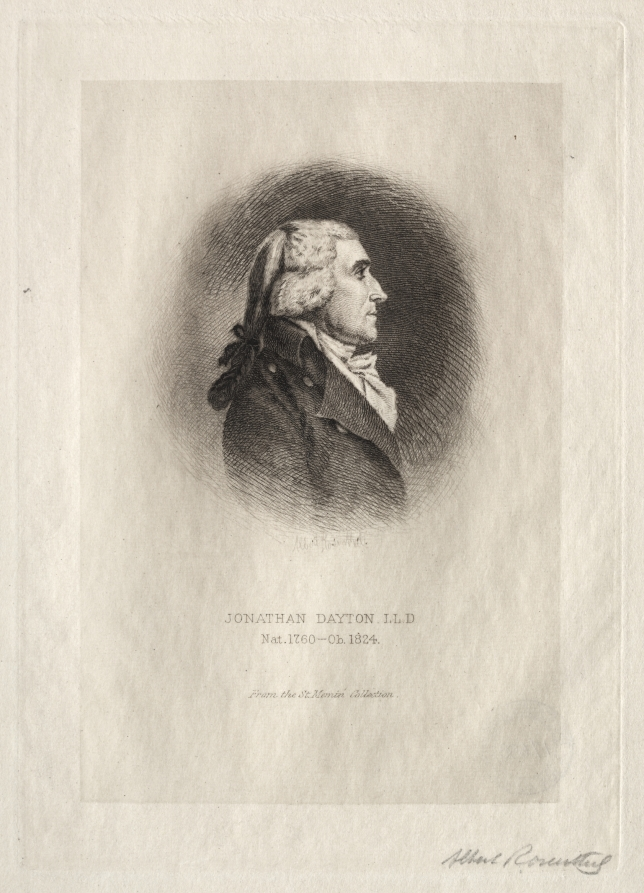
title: Jonathan Dayton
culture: America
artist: Albert Rosenthal (American, 1863–1939)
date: 1863–1939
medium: etching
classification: Print